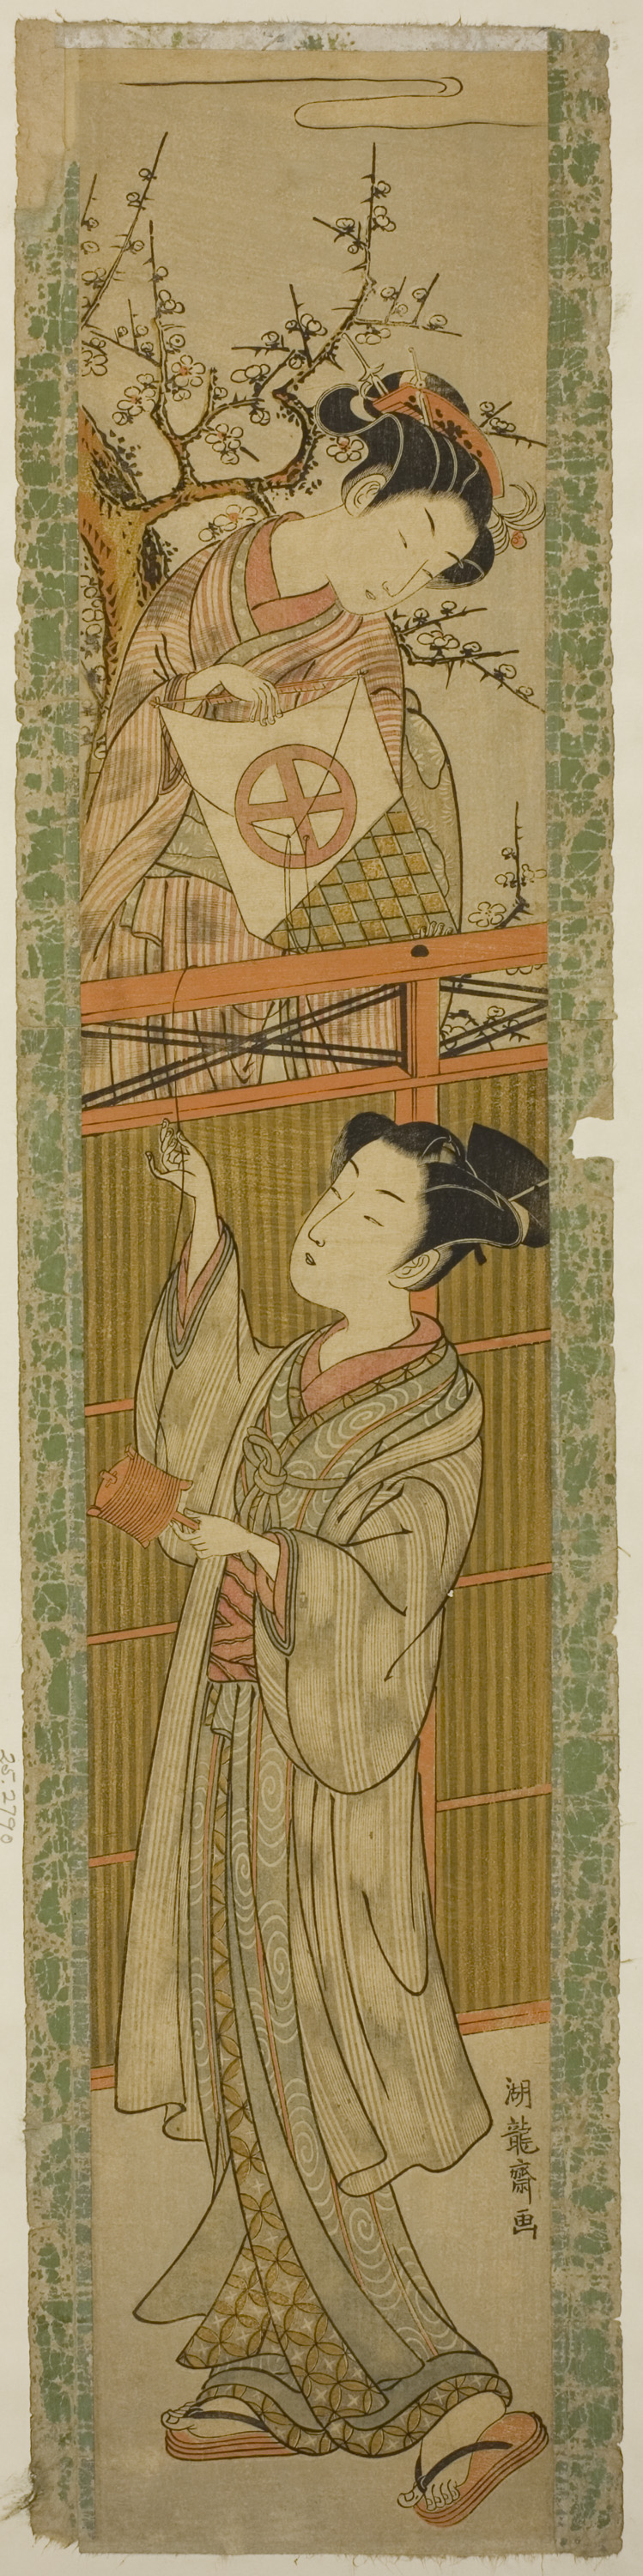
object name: Print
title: Young Woman Returning a Kite to a Young Man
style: Japanese (culture or style)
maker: Isoda Koryusai (Japanese, 1735-1790)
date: c. 1772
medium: Color woodblock print; hashira-e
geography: Japan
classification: woodblock print; print; asian art